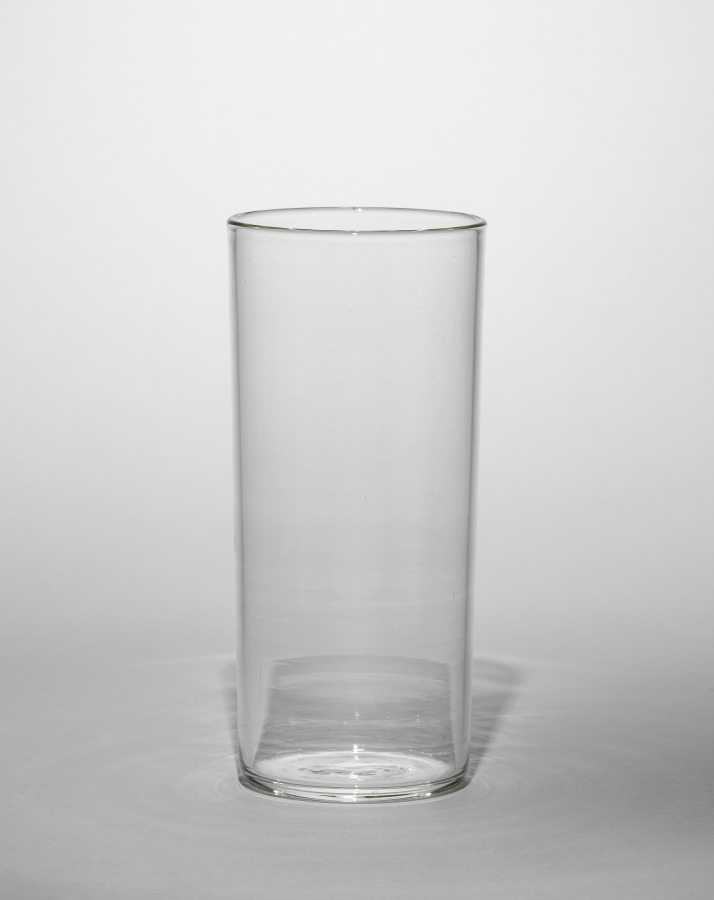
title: Tea Cup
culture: Russian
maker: House of Fabergé (Russian, 1842–1918)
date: 1908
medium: glass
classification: Glass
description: Fabergé drew upon different historical styles and applied them to the same object type with a consistently high level of finesse. The holder for this tea glass incorporates a range of classicizing ornamental designs from the turn of the nineteenth century, such as the Greek key pattern on the horizontal bands and the intermittent palmettes.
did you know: In Russia, tea has been served in glasses since the eighteenth century.